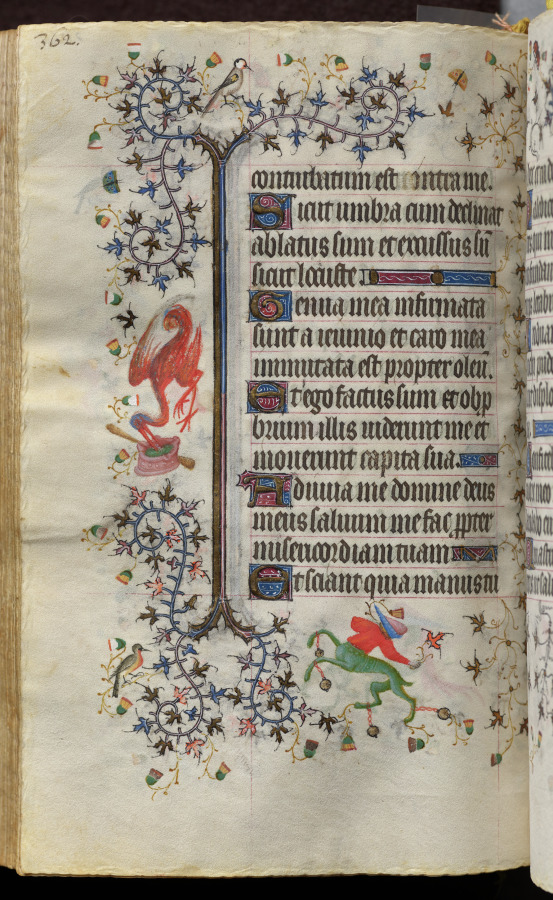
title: Hours of Charles the Noble, King of Navarre (1361-1425): fol. 176v, Text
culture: France, Paris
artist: Master of the Brussels Initials and Associates (French)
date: c. 1405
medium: ink, tempera, and gold on vellum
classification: Bound Volume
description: This precious volume was obviously highly prized by its owner, the French-born King of Navarre, who had his coat of arms painted on no less than twenty folios. Rather than directly commissioning this manuscript from a specific workshop, it seems that Charles the Noble acquired his book of hours -- perhaps ready-made for the luxury market -- while on a trip to Paris in 1404-05. A collaborative effort, six painting styles are evidenced within the pages of this codex, those of two Italians, two Frenchmen, and two Netherlanders. The painter who was responsible for the planning and decoration of the book, and who produced seventeen of the large miniatures, was a Bolognese artist known as the Master of the Brussels Initials. His principal assistant, responsible for most of the borders, was a Florentine who signed his name "Zecho" da Firenze on folio 208 verso.